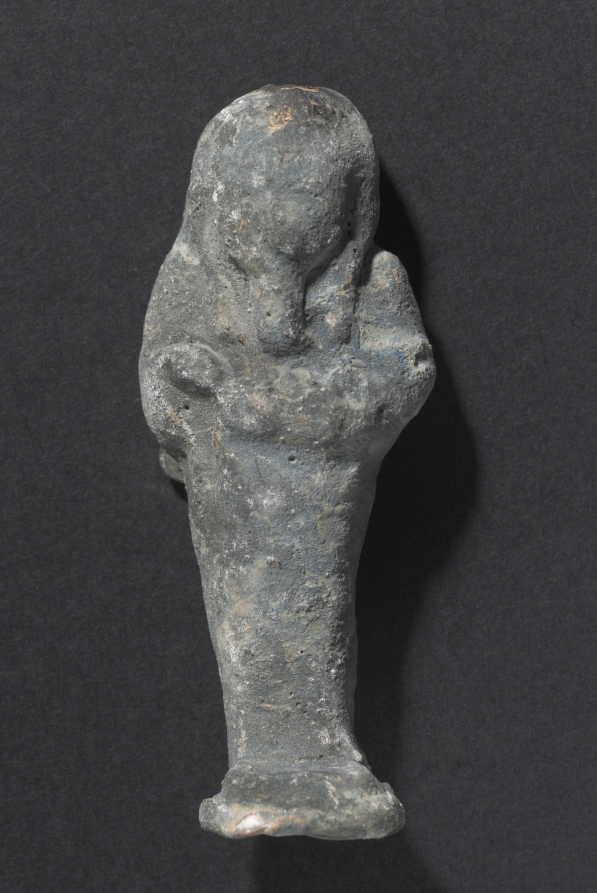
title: Shawabty of Ditamenpaankh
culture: Egypt, Late period (715–332 BCE), Dynasty 25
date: 715–656 BCE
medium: terracotta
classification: Funerary Equipment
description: High demand for shawabtys in the Late Period, a time when as many as 400 or more shawabtys were placed in the tomb with the deceased, gave rise to a specialized container for storing them: the shawabty box. This example is inscribed for the lady of the house, Ditamenpaankh, and was probably one of a pair originally made for her. The single-masted boat on the box's lid is perhaps an allusion to the pilgrimage of the deceased to the holy city of Abydos, the cult city of Osiris, king of the dead. The shawabtys inside are crude, mass-produced examples cast in an open mold. Made of terracotta, their blue paint imitates more costly shawabtys made of faience. As for the shawabty spell, it has been removed from its traditional location on the shawabty's front and relocated onto the sides of box, where it needed only to be written once, thus expediting production.